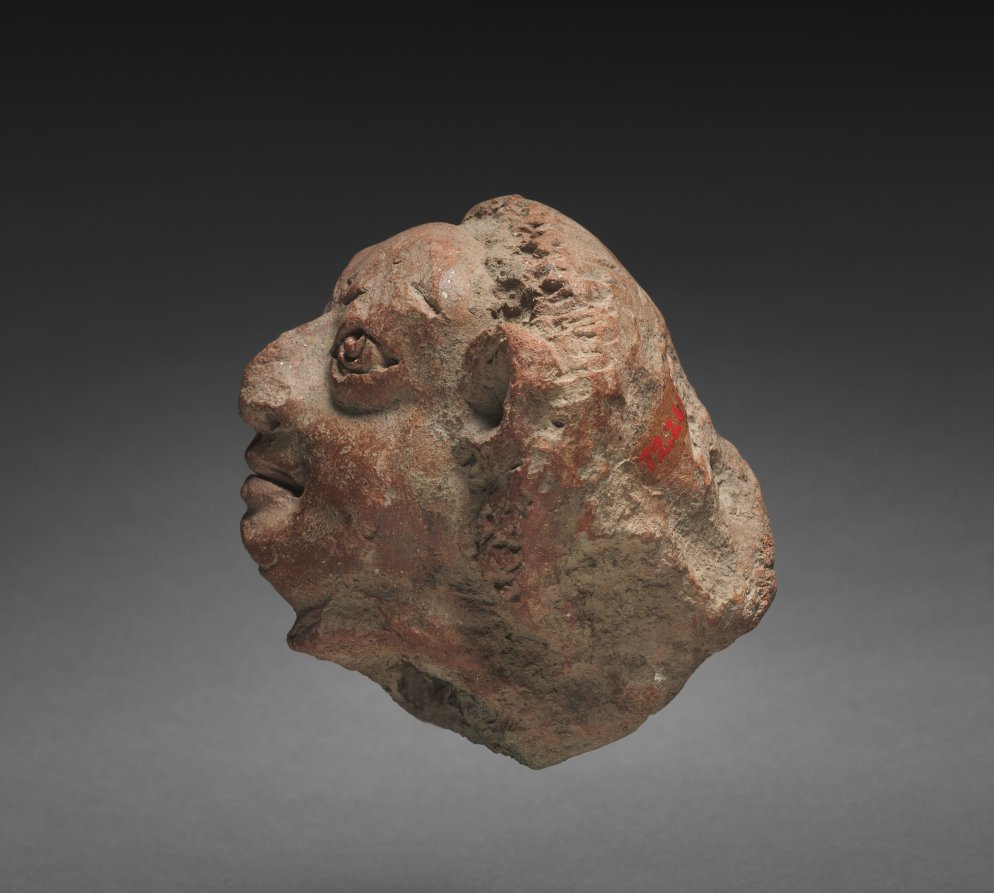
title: Grotesque Male Head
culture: India, Gupta period (320–647)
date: c. 400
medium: terracotta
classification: Sculpture